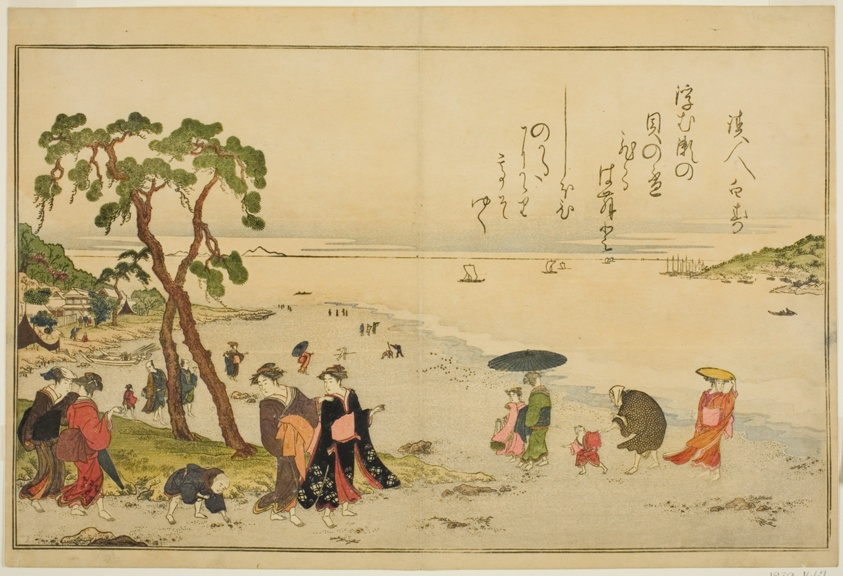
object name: Print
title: Gathering Shells at Low Tide, from the illustrated book "Gifts from the Ebb Tide (Shiohi no tsuto)"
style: Japanese (culture or style)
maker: Kitagawa Utamaro 喜多川 歌麿; Japanese, 1753 (?)-1806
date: 1789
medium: Color woodblock print; double-page illustration from book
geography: Japan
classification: woodblock print; print; asian art